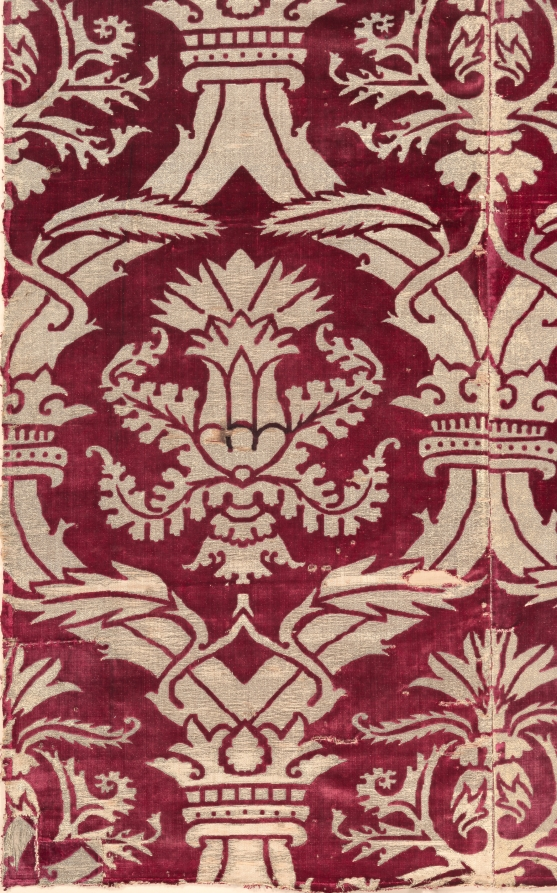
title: Brocaded Velvet Panel with Italianate Pattern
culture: Turkey, Istanbul or Bursa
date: 1575–1625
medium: Silk: velvet, brocaded; gilt-metal thread and cotton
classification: Velvet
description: Rarely are four fabric widths preserved together from any culture. This gilt-metal thread pattern combines Turkish and Italian features: the large ogival (curved) lattice clasped by crowns and the velvet structure are Turkish, and the two so-called artichoke designs are enlarged adaptations of Italian motifs. A symbol of wealth and power, this velvet panel was woven during the artistic height of the Ottoman Empire in the late 1500s. It may have covered a divan (sofa) or possibly enhanced a wall during cold winters in the imperial Topkapi Palace in Istanbul.